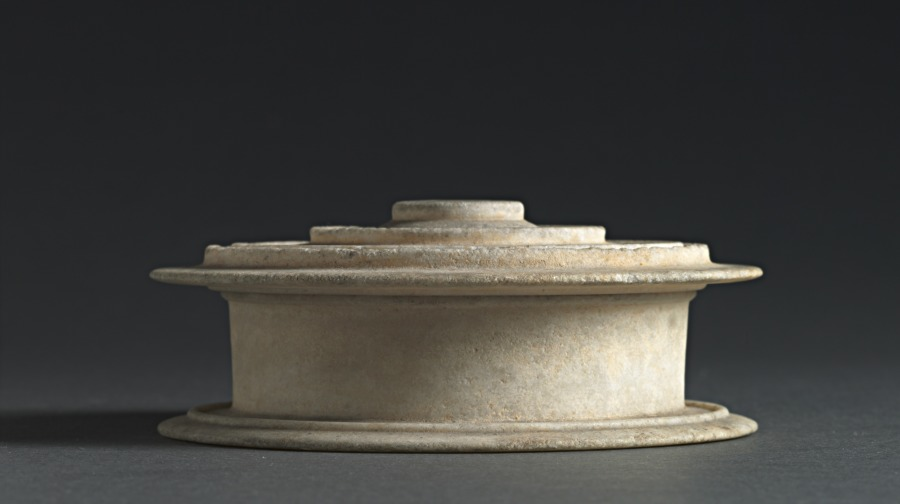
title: Pyxis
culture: Greece, Attic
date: 400–300 BCE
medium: marble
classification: Stone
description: Pyxides came in a huge variety of sizes, shapes, and materials in the ancient world. Images of pyxides in Greek art often show them being used by women, which has led scholars to believe that they may have been used to hold jewelry or cosmetics. This pyxis is one of few surviving examples made from stone, signifying that it may have had an elite owner.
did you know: This vessel has a threaded lid, like a modern mason jar, allowing it to be tightly sealed.